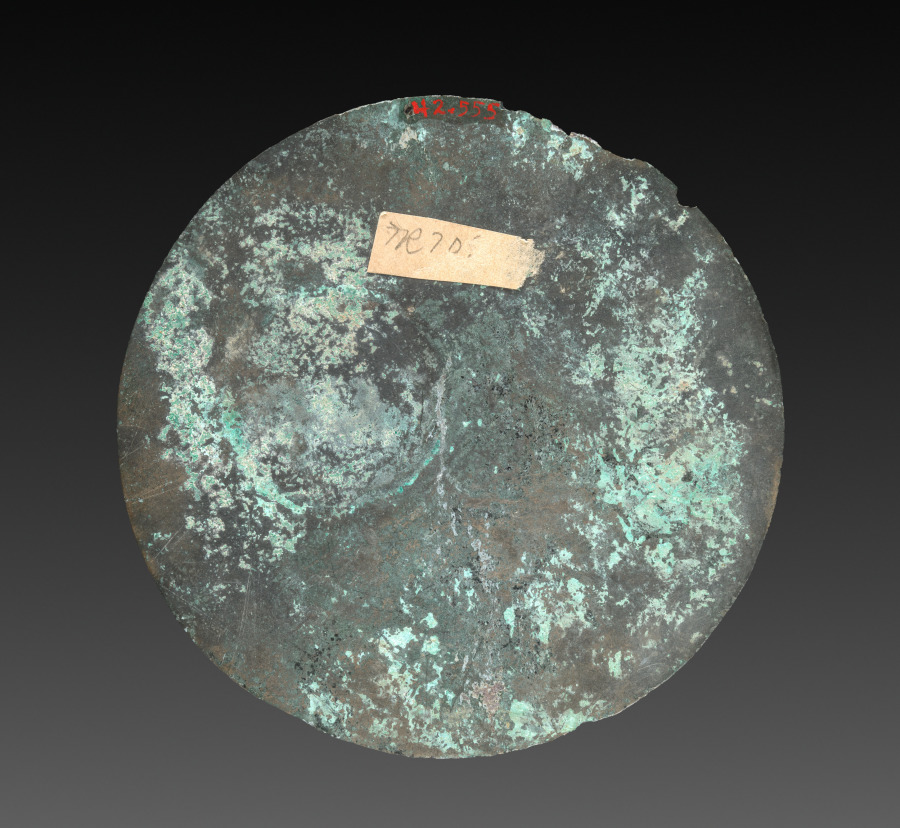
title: Mirror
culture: Japan, Kamakura period (1185–1333)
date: 1185–1333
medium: silvery bronze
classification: Metalwork